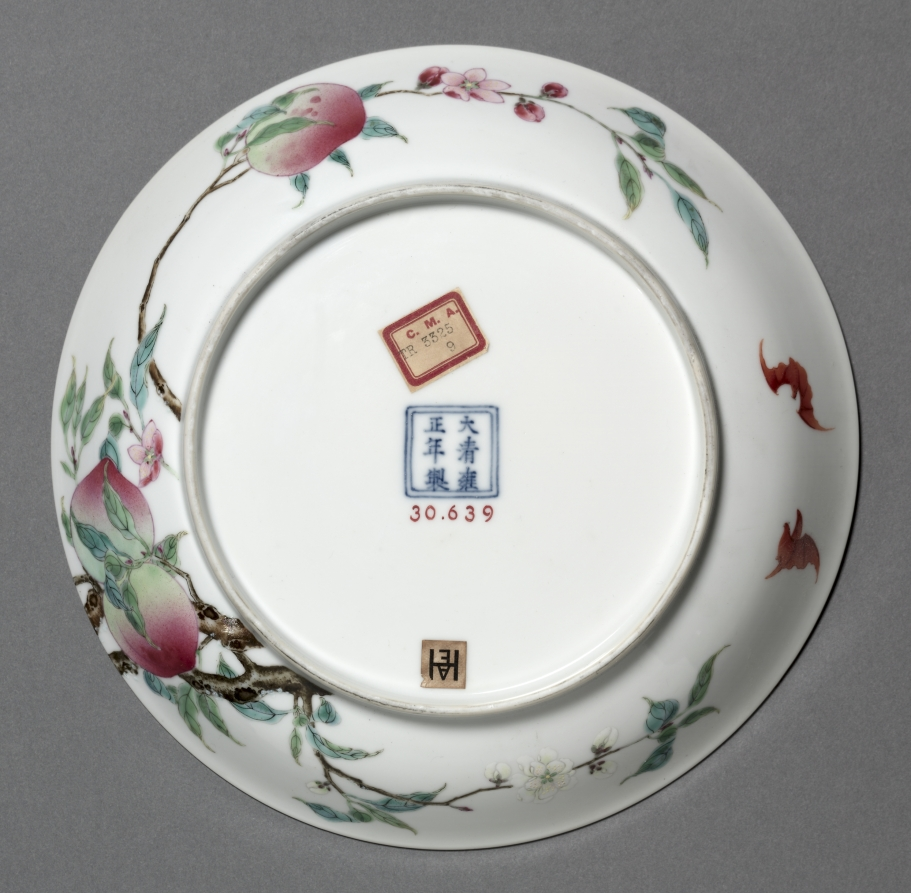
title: Dish with Bats and Peaches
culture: China, Jiangxi province, Jingdezhen kilns, Qing dynasty (1644-1911), Yongzheng mark and reign (1722-35)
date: 1723–35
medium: porcelain with famille rose overglaze enamel decoration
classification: Ceramic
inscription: 大清雍正年制